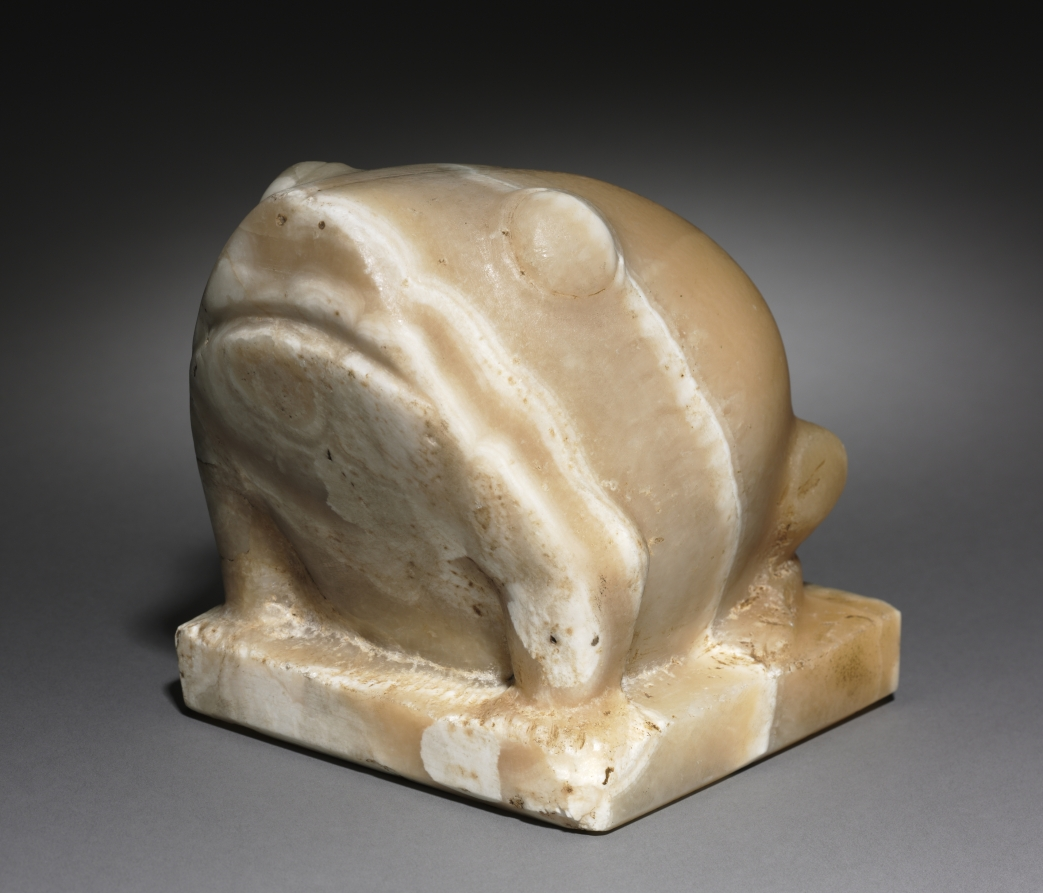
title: Statue of Heqat, the Frog Goddess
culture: Egypt, Predynastic (5000–2950 BCE), Naqada III (3200–3000 BCE)–Egypt, Early Dynastic (2950–2647 BCE), Dynasty 1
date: c. 2950 BCE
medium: travertine (Egyptian alabaster)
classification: Sculpture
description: During the Predynastic period statues of animals are much more common than those of humans. This statue of a frog stands at the beginning of a great tradition of animal sculpture in Egyptian art. The sculptor has shown great sensitivity to the natural banding of the stone, using it to enhance the roundness of the animal's form. Small frogs, mostly of faience, are among the most common votive offerings deposited at early temple sites. The frog's exact religious significance in the Predynastic period is unknown, but in later times it was most often identified with Heqat, the goddess who assisted at childbirth.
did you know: This probably represents a puffed-up Bufo viridis, one of two types of "frogs" (it is actually a toad) represented in Egyptian art.